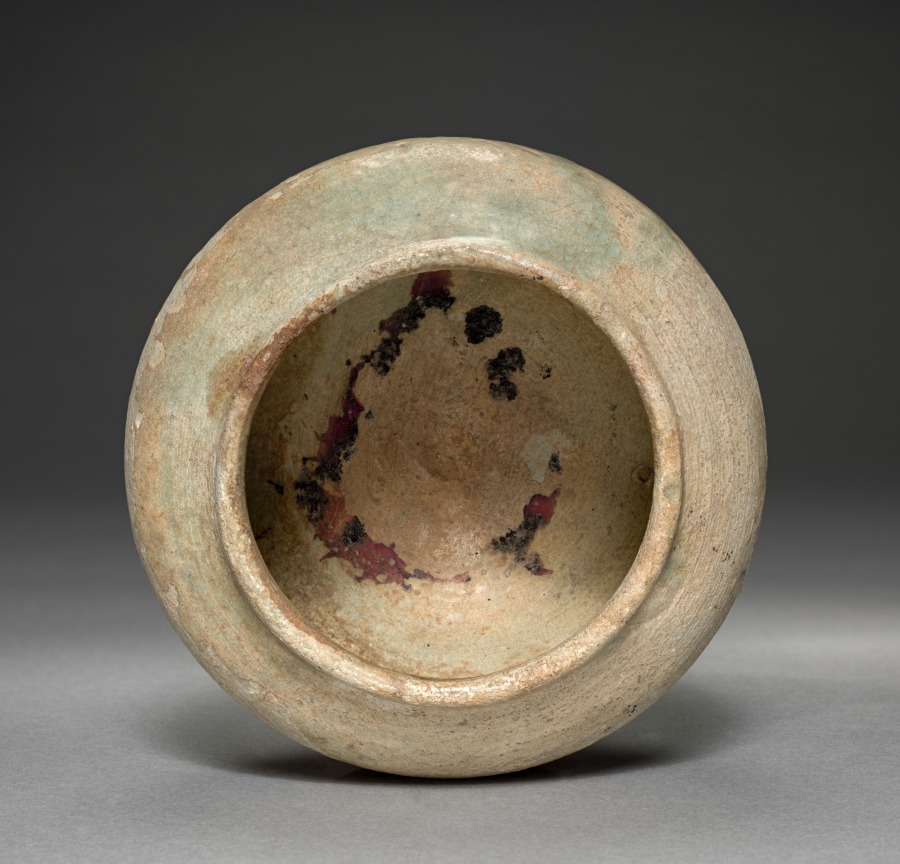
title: Jar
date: 1100s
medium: Pottery, glazed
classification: Ceramic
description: This jar is one of the rare porcelain examples from the Goryeo period (918–1392). In Korea at that time, both celadons and porcelains were produced in the same kilns, explaining why this porcelain jar bears a greenish blue glaze.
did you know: This jar is one of the rare porcelain examples from the Goryeo period (918–1392).